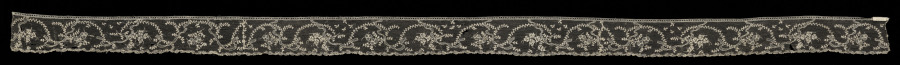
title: Lace Edging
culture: France, Alençon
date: 1740–60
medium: Needle lace (Point d'Alençon)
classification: Lace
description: With its flowing ribbon and garland pattern, this lace edging is from the late Louis 15th period or early Louis 16th period.